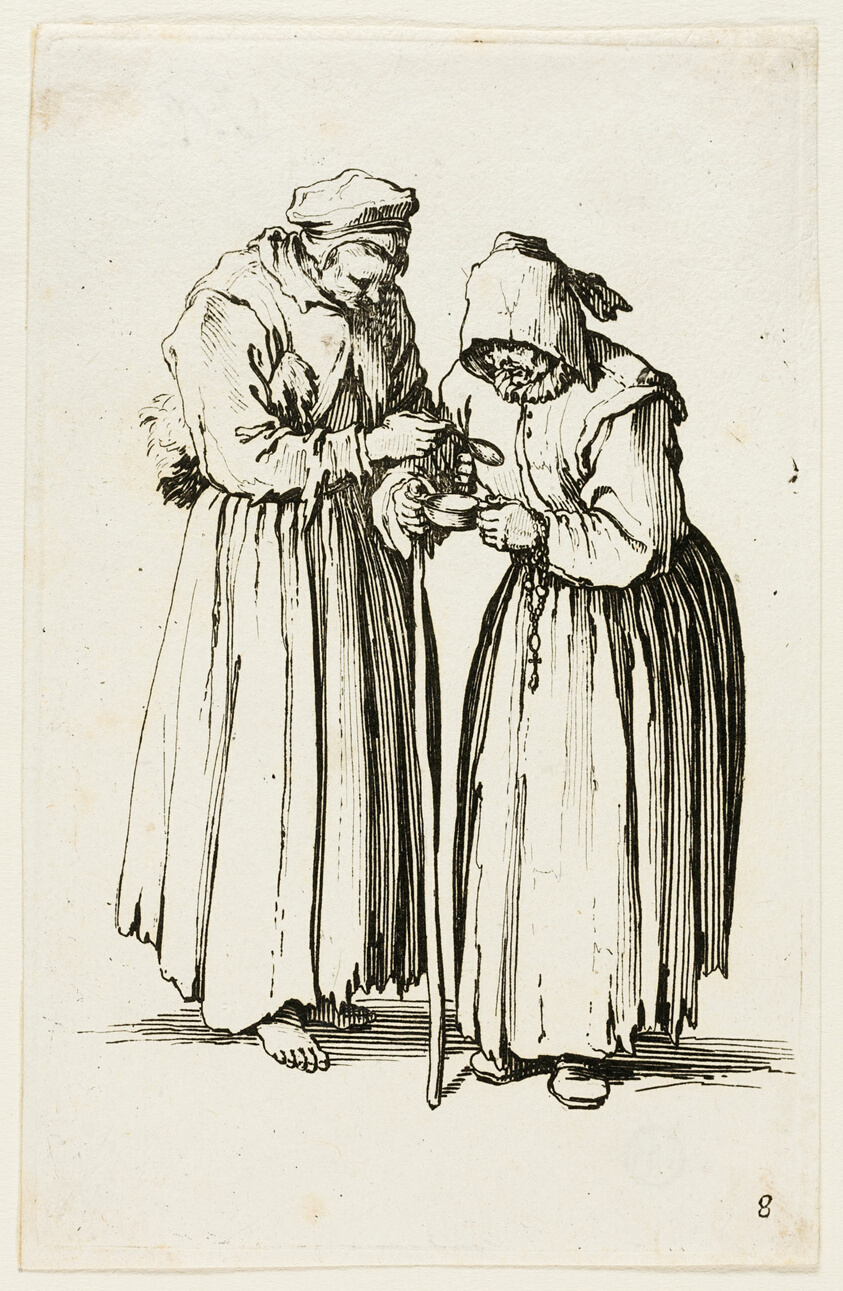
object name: Print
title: Two Women Beggars, plate eight from The Beggars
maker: Jacques Callot (French, 1592-1635)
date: c. 1622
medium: Etching on paper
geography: France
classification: etching; print; prints and drawing